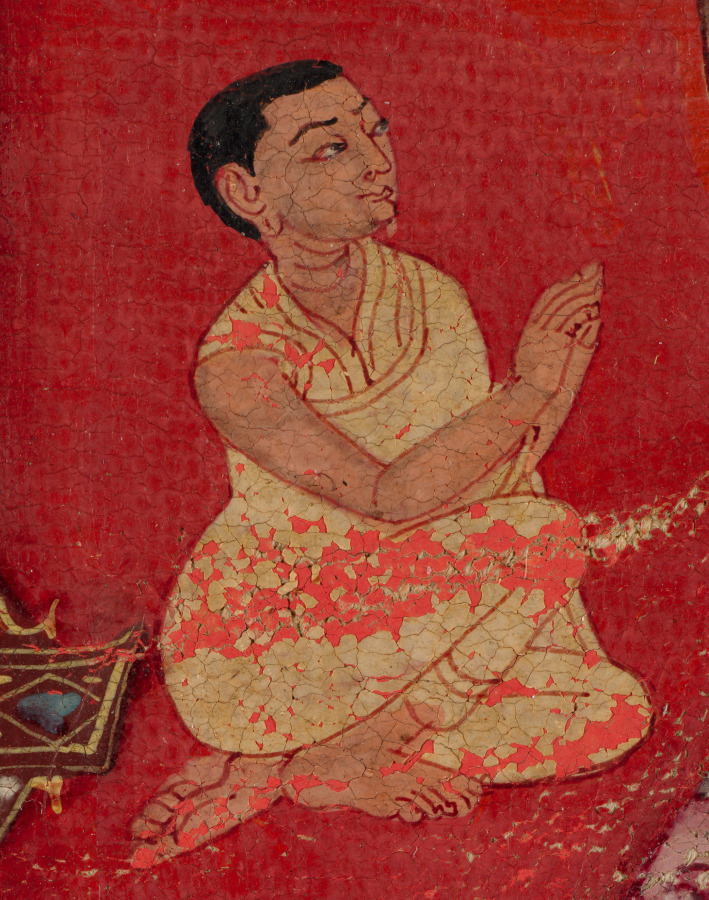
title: Green Tara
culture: Central Tibet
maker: attributed to Aniko (Nepalese, active in Tibet mid- to late 1200s)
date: c. 1260s; mounted, 2020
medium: thangka; gum tempera, ink, and gold on sized cotton; mount: silk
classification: Painting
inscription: Om Ah Hum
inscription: om tare tutare ture svaha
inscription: Om Ah Hum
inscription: Om Ah Hum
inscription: om ah sarva vyida svaha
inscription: ye dharmā hetuprabhavā he- tuṃ teṣāṃ tathāgato hy avadat teṣāṃ ca yo nirodha evaṃvādī mahāśramaṇaḥ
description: For Tibetans, Green Tara is one of the preeminent figures of their Buddhist faith, a radiant savioress who embodies the female form of the perfect, enlightened mind. The Green Tara in the Cleveland thangka—a Tibetan devotional painting on cloth—specifically dispels fear and provides protection, just like her mantra inscribed on the back side of the painting. Her green color and fear-not gesture link her to the cosmic Buddha of the North, enshrined above her head. Most scholars agree that this work was painted by the celebrated Nepalese artist known as Aniko.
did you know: The tiny monastic figure under Green Tara's right hand commissioned the painting.